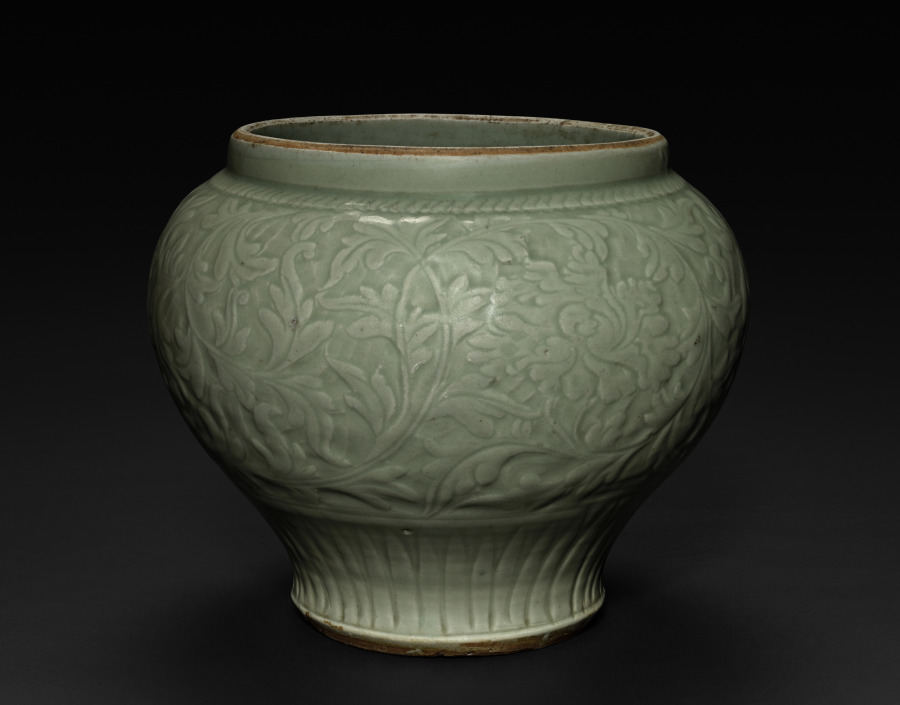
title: Jar: Celadon Ware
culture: China, Ming dynasty (1368–1644)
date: 1368–1644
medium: stoneware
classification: Ceramic